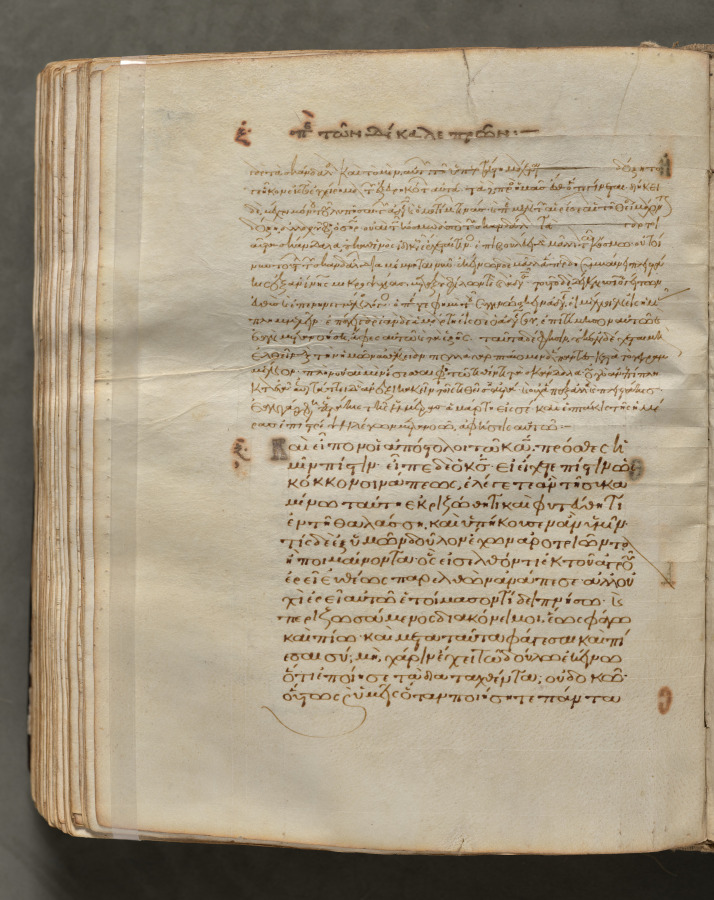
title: Text, folio 286 (verso), from a Gospel Book with Commentaries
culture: Byzantium, Constantinople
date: c. 1000–1100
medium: ink, tempera, and gold on vellum; leather binding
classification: Bound Volume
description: Each of the four gospels in this book opens on a page with brilliantly illuminated borders depicting the author of the text as well as birds—principally peacocks, symbols of the immortality of the soul—and fountains, representing the fountain of life and the salvation of the soul. This volume consists of 428 leaves with texts in Greek. Its level of sophistication suggests that it was probably written and decorated in a monastery in Constantinople.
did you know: Gospel books were carried in procession through Byzantine churches.